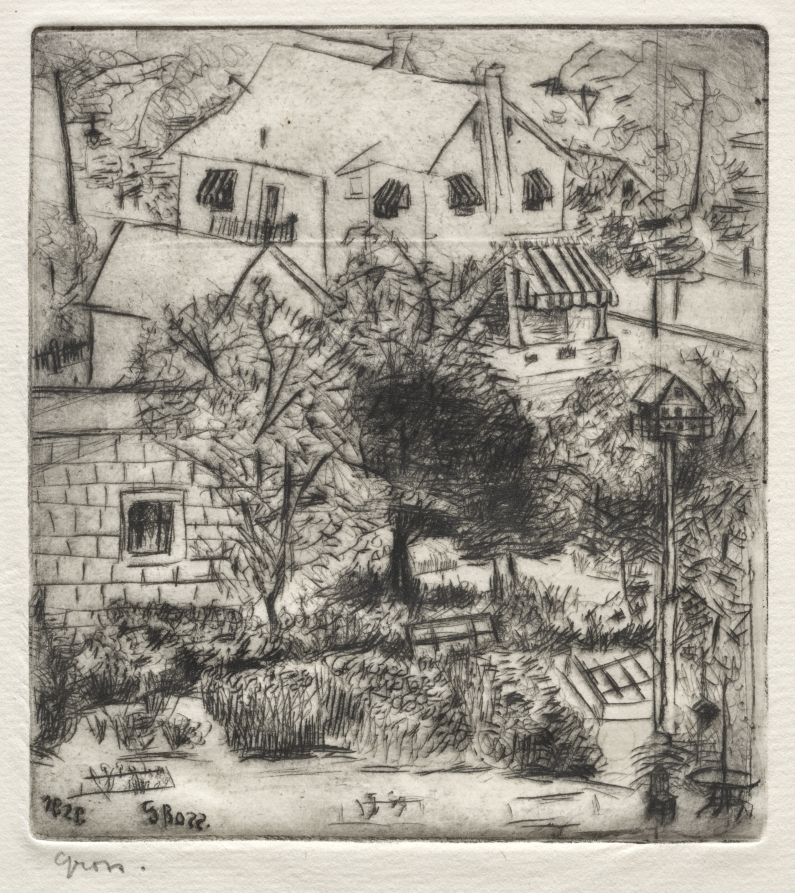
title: Landscape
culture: America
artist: Jolán Gross-Bettelheim (American, 1900–1972)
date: 1929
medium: drypoint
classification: Print